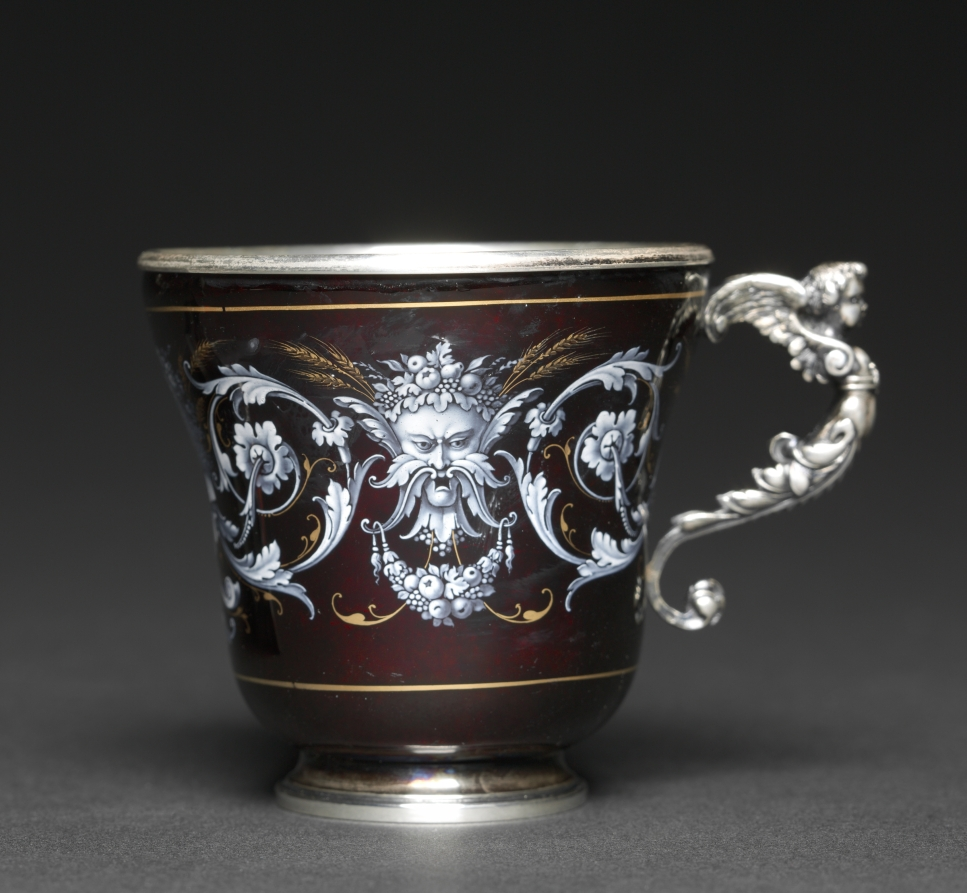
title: Cup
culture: France, 19th century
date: c.1880–1900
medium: silver, enamel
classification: Enamel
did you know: This cup and saucer were made during the Belle Epoque or "Beautiful Era" in France.